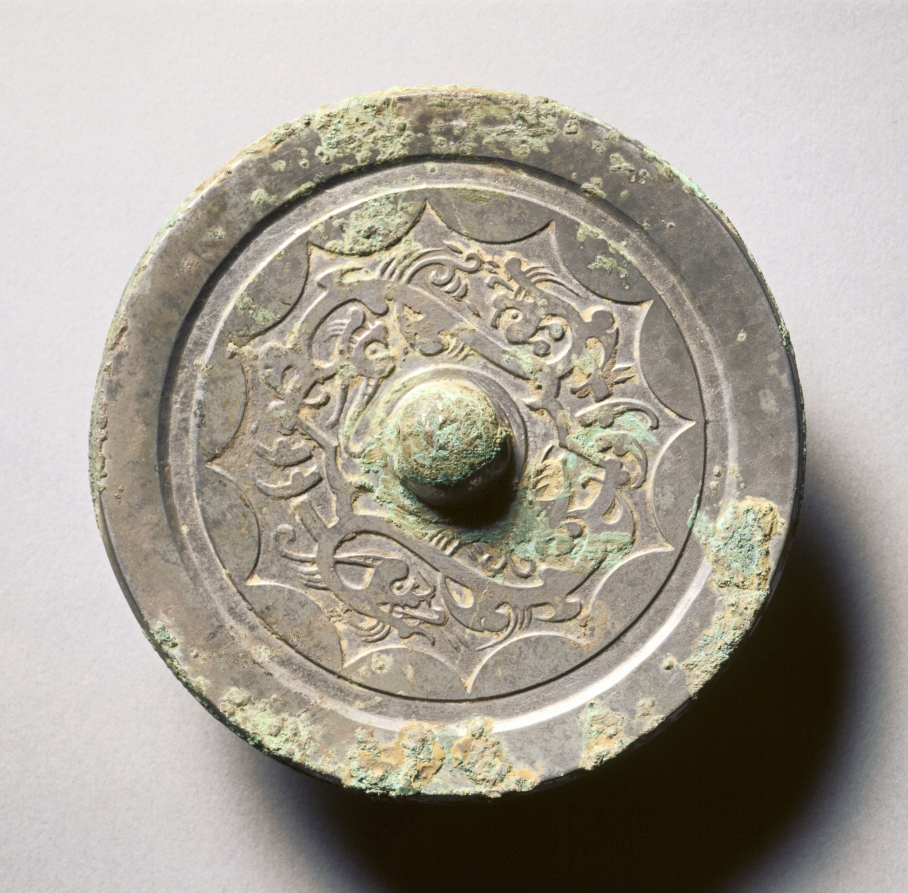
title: Mirror with Linked Arcs and Kui Dragons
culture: China, Eastern Han dynasty (25–220 CE)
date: 200–100 BCE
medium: bronze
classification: Metalwork